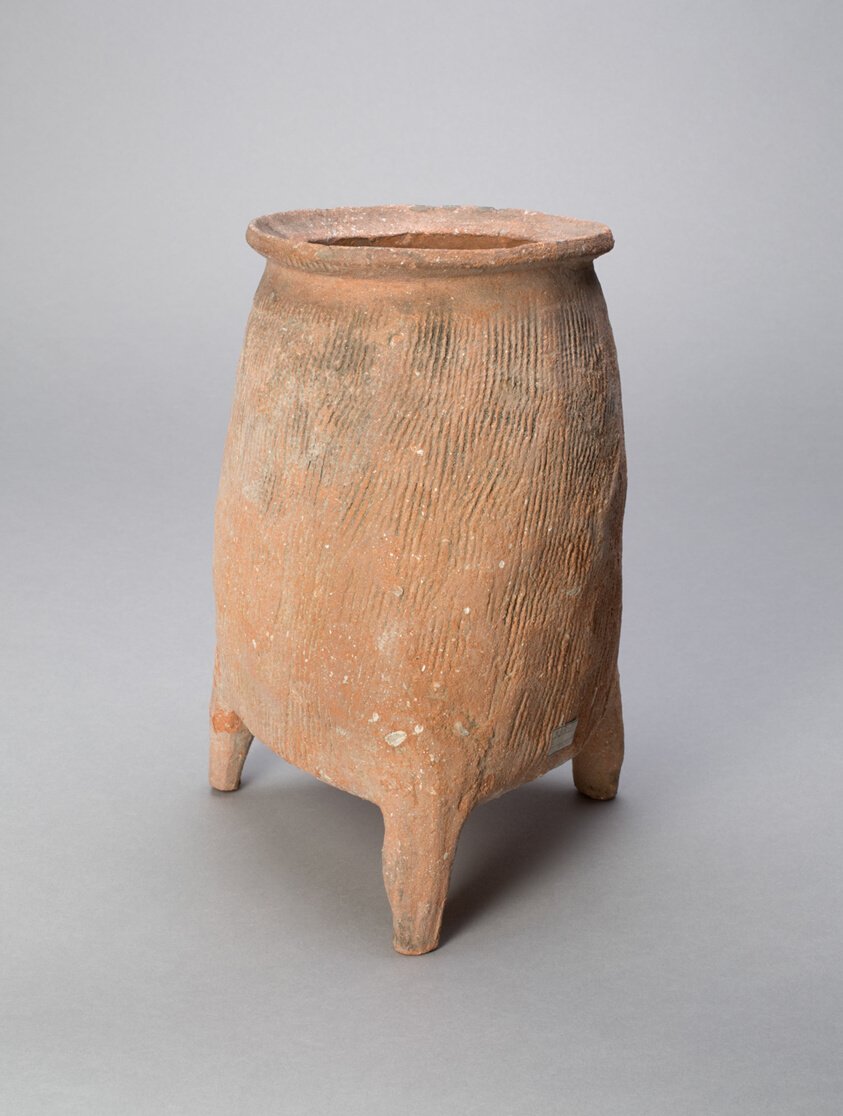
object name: Vessel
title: Tripod Vessel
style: Chinese (culture or style)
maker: China, probably Hebei province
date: Eastern Zhou dynasty, Warring States period (480–221 B.C.)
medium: Brick-red earthenware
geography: China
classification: vessel; earthenware; asian art; ceramics